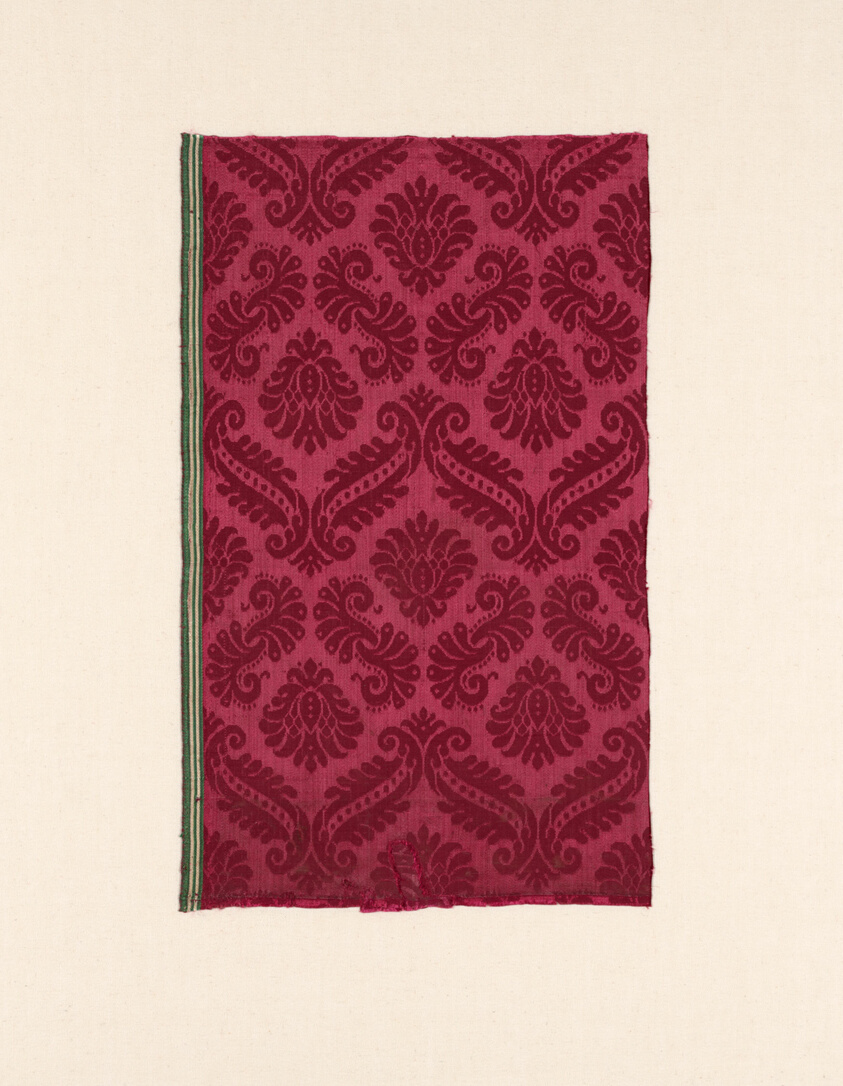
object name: Textile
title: Fragment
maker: Italy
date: 1575/1600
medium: Silk, 4:1 satin damask weave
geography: Italy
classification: textile; weaving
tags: flowers, foliage